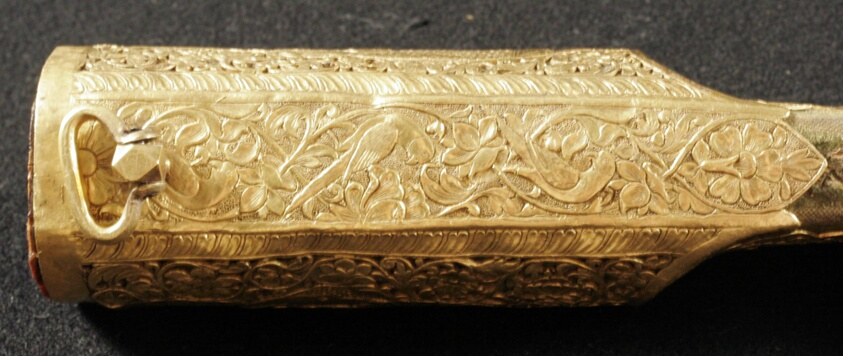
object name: Armor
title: Knife (Kard) with Battling Elephants, Rhinoceros and Lions on the sheath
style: South Asian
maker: India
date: 18th century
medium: Watered steel, ivory, and pierced and chased gold, wood and velvet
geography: India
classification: edged weapon-sword; armor